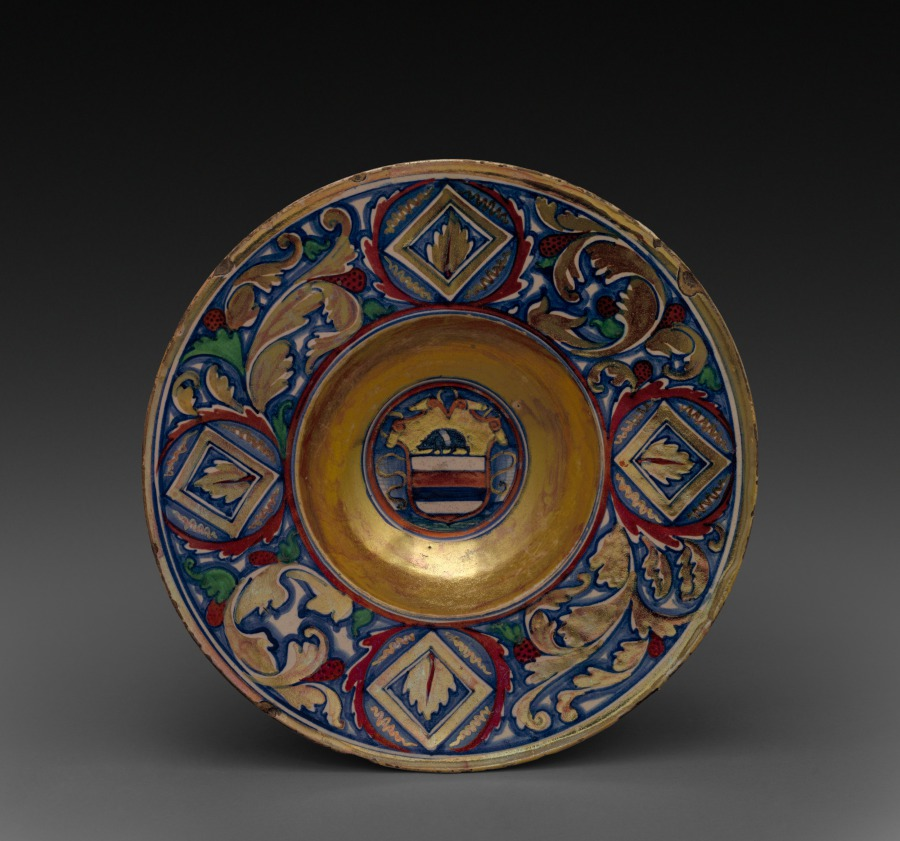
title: Plate with the Arms of the Rizzardi Family of Venice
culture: Italy, Gubbio, 16th century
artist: attributed to Maestro Giorgio Andreoli (Italian, 1465?–1553)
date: c. 1525–1530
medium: tin-glazed earthenware with gold and red lustre (maiolica)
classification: Ceramic